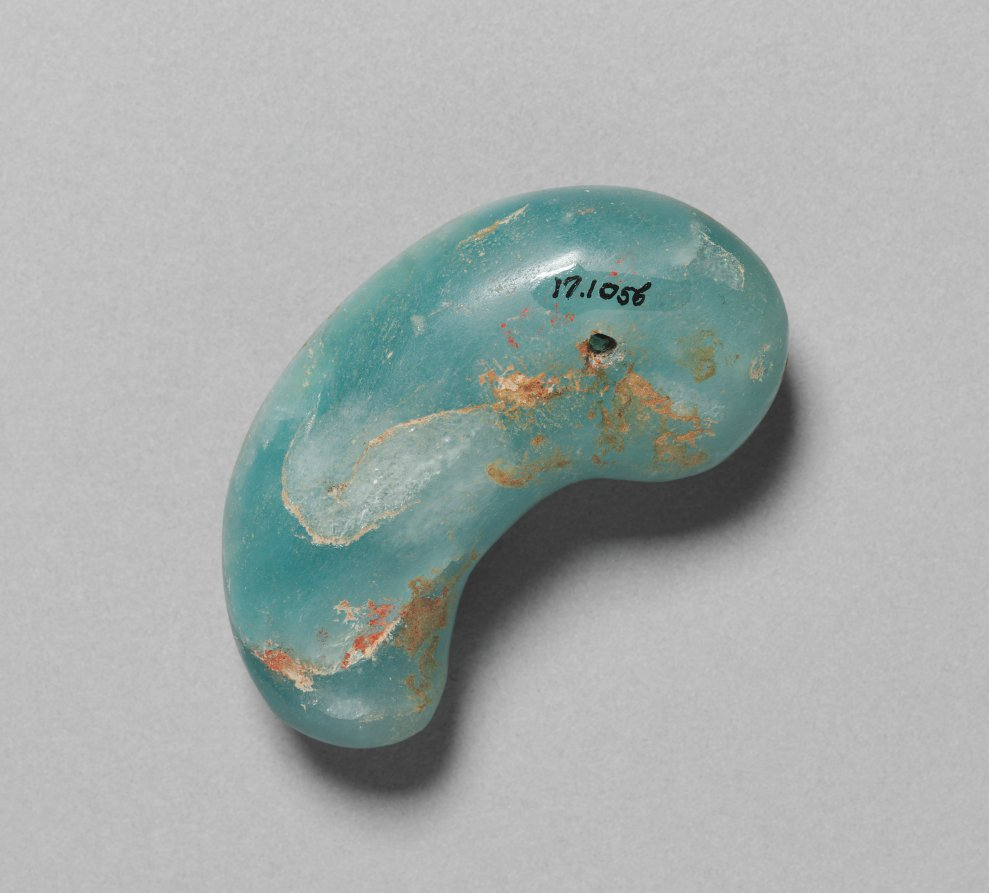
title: Comma-shaped Jade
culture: Korea, Three Kingdoms period (57 BCE–668 CE)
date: 400s CE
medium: glass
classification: Jewelry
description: Jade is one of the hardest stones and requires an intensive, arduous process of abrasion—cutting, chiseling, grinding, and polishing—to achieve the desired shape. A grindstone and a slurry of grit and water shape the jade into the desired form, and then a cloth dampened and rubbed with finer grit may have been used to give the jade the smooth surface. For the Silla kingdom (57 BC–985), in particular, comma-shaped jades served as an essential item for the burials of the ruling class and were luxurious accessories to decorate golden crowns. Their comma shape is thought to represent embryonic forms, symbolizing life, particularly rebirth in the afterlife.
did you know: This unique shaped jade was used as a pendant to decorate necklaces, earrings, and crowns during the Three Kingdoms period.